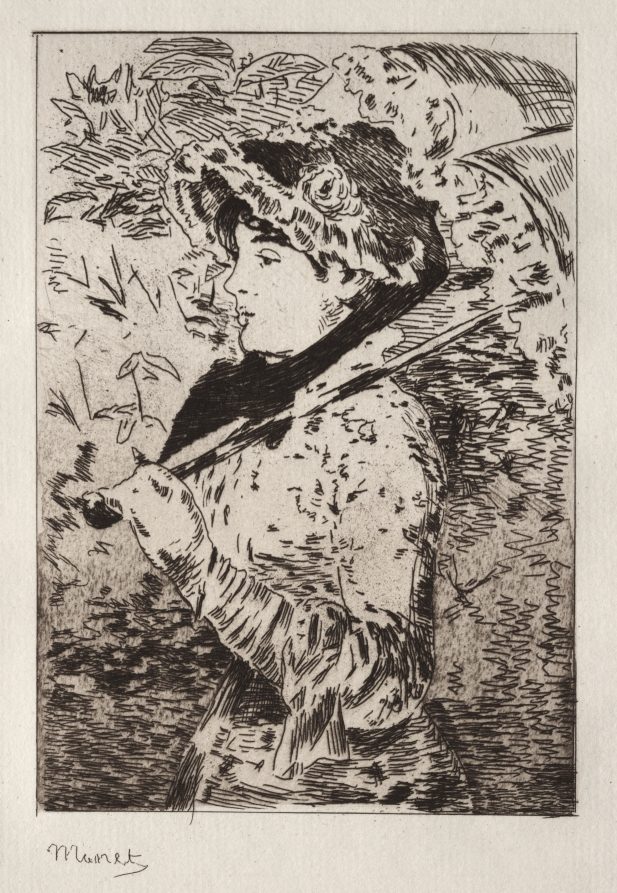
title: Jeanne: Spring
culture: France, 19th century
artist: Édouard Manet (French, 1832–1883)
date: 1882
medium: etching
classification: Print